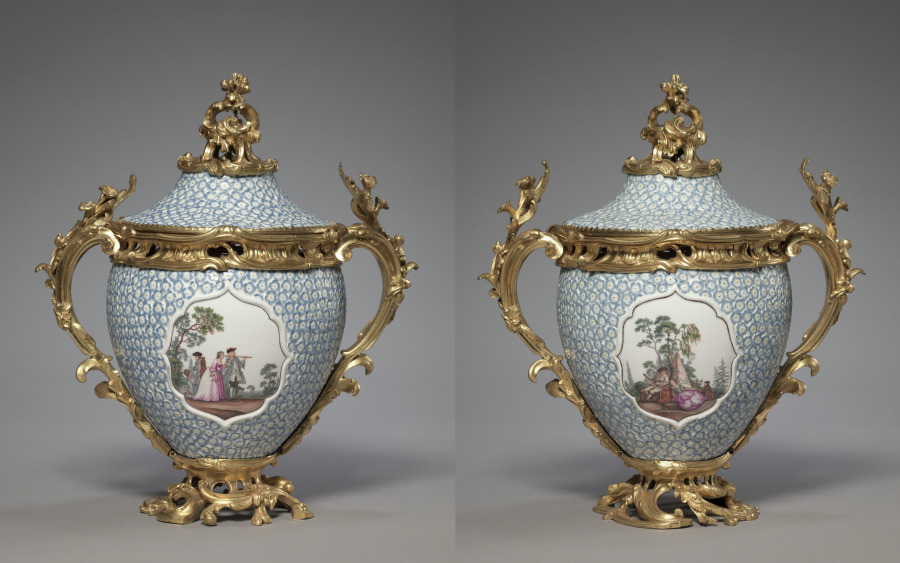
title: Pair of Covered Vases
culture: Germany, 18th century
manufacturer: Meissen Porcelain Factory (German, est. c. 1710)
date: 1749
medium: porcelain mounted in gilt bronze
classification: Ceramic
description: One of these vases is dated 1749. They were perhaps part of a set of four covered vases that we know from documents were acquired by Mme. de Pompadour, mistress of Louis XV in 1752.